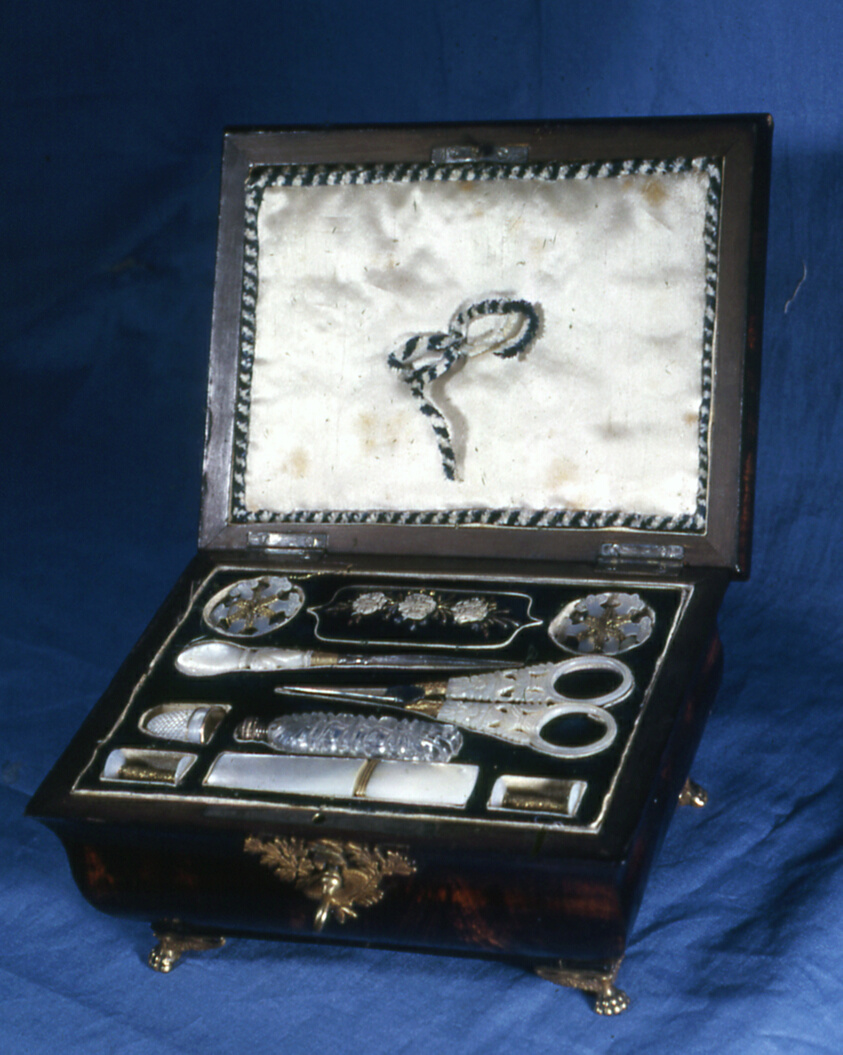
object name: Decorative Arts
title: Sewing Box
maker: France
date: 19th century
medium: Wooden box, brass-colored fittings; mother-of-pearl tools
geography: France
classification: sewing boxes; accessories (object genre); textile; decorative arts